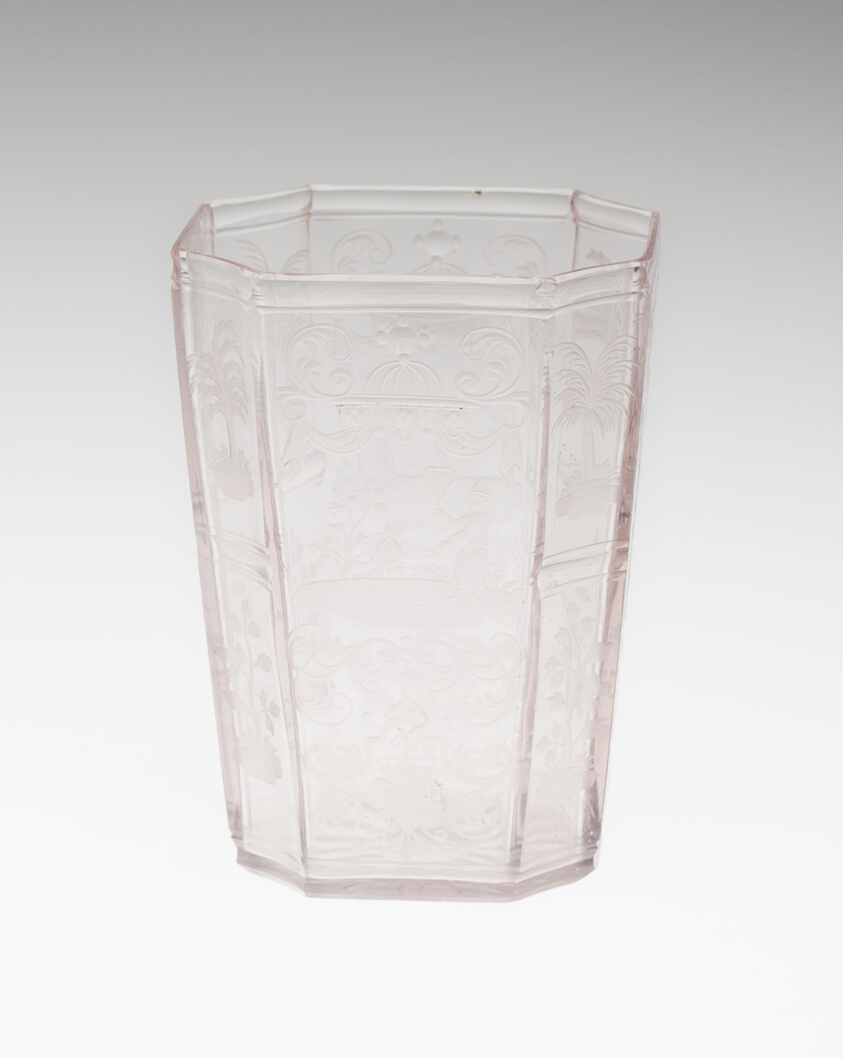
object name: Glass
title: Beaker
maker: Bohemia, Czech Republic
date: c. 1720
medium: Glass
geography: Bohemia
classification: glass; european decorative arts